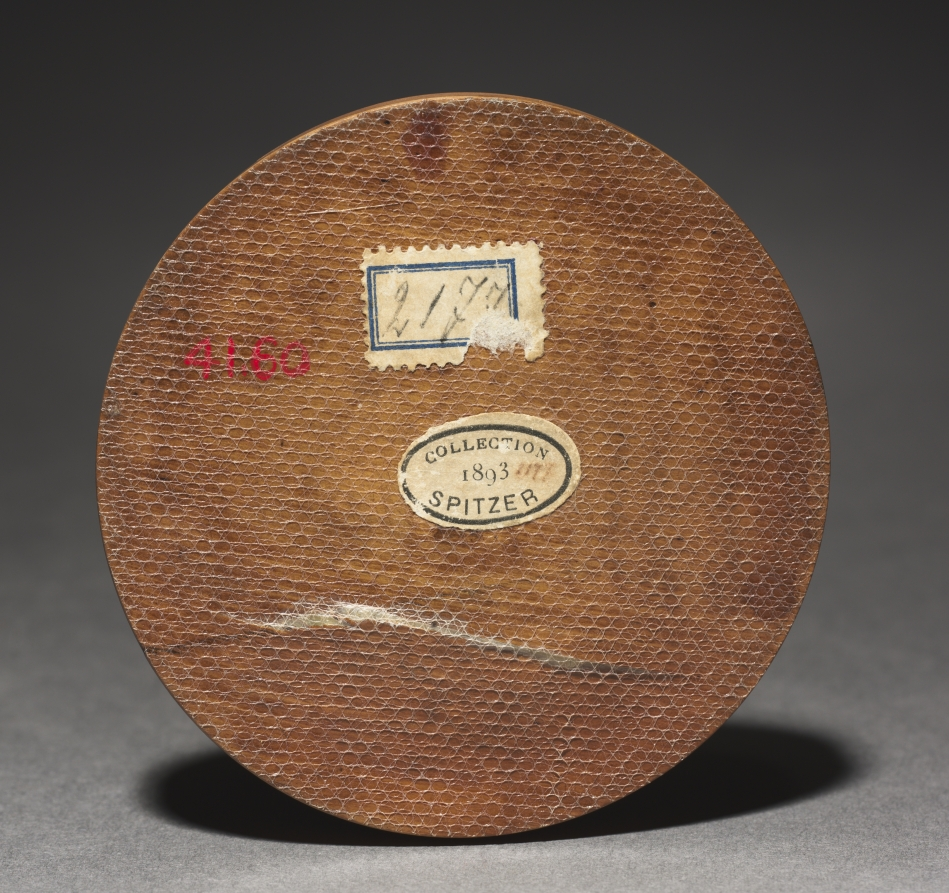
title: Portrait of a Man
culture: Germany, early 16th century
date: early 1500s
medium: boxwood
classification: Sculpture